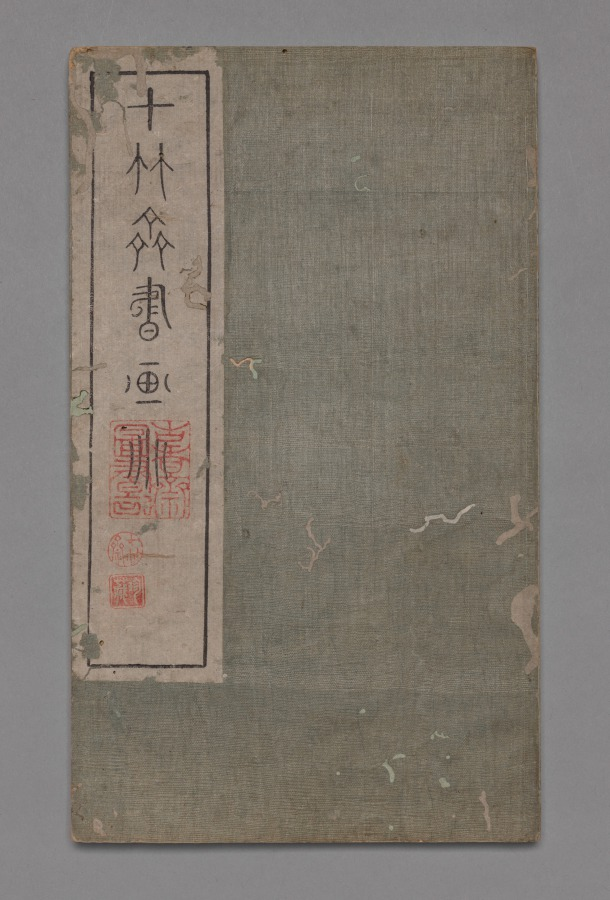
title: Ten Bamboo Studio Collection of Calligraphy and Painting: Miscellaneous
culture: China, Qing dynasty (1644-1911)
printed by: Hu Zhengyan (Chinese, c. 1584–1674)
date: 1633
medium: Woodblock-printed book; ink and colors on paper; first edition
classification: Print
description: Color printing reached a level of perfection in the early 1600s, as seen in this Ten Bamboo Studio Collection of Calligraphy and Painting and the Mustard Seed Garden Manual of Painting (printed 1679 and 1701). The painterly quality, precision in registering (aligning) the woodblocks, and harmonious colors made them the most successful color print editions in Chinese history. Both editions were printed and compiled in Nanjing, spread nationwide, and had a great impact on the arts in Japan and Korea.